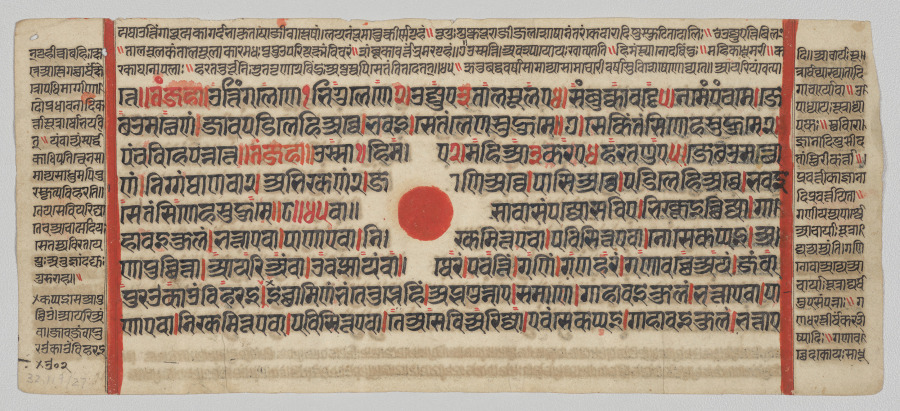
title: Text, Folio 74 (recto), from a Kalpa-sutra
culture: Western India, Gujarat, last quarter of the 15th century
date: c. 1475–1500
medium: Gum tempera, ink, and gold on paper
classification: Painting